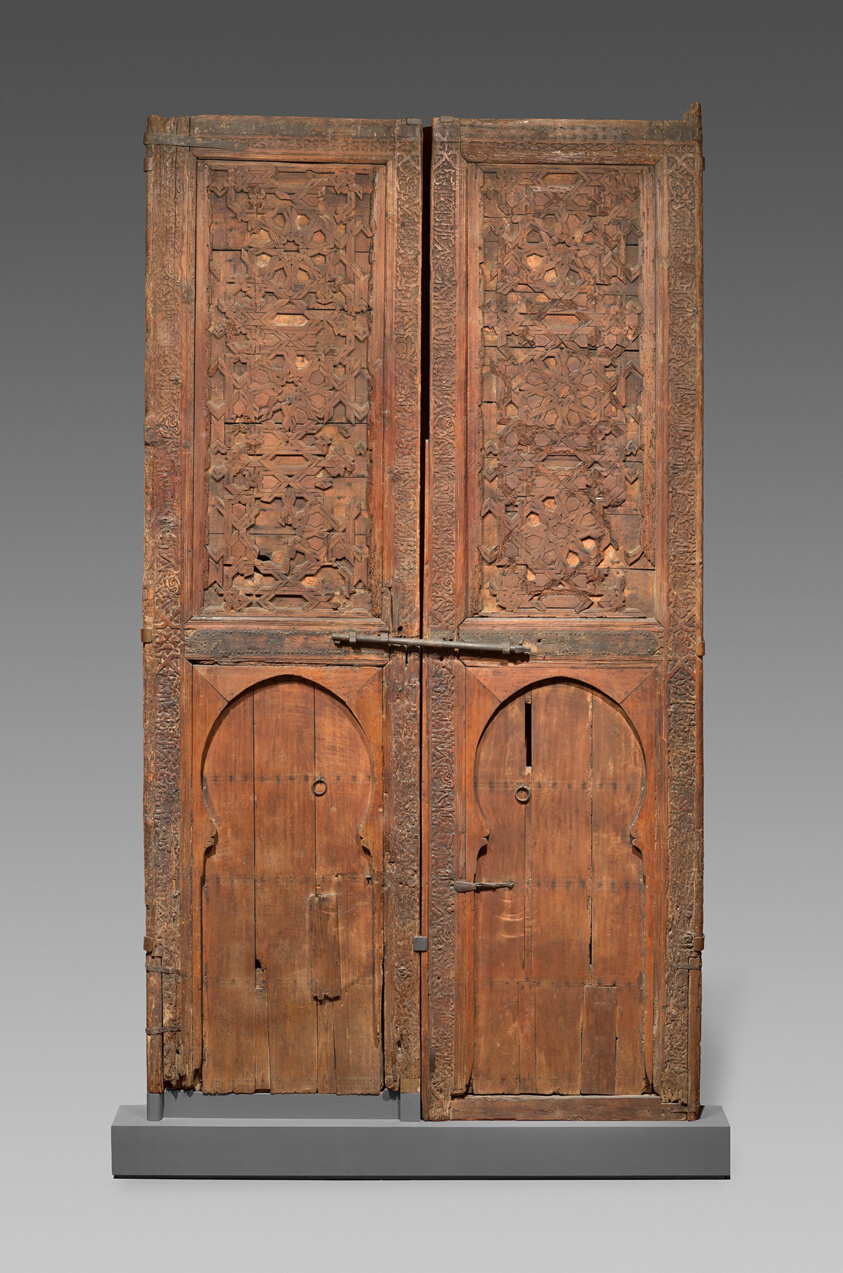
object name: Architectural fragment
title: Pair of Doors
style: Islamic (culture or style)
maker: Morocco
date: Marinid dynasty (1244–1465), 14th century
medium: Carved wood with iron bolts and rings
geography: Morocco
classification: wood; architectural fragment; asian art